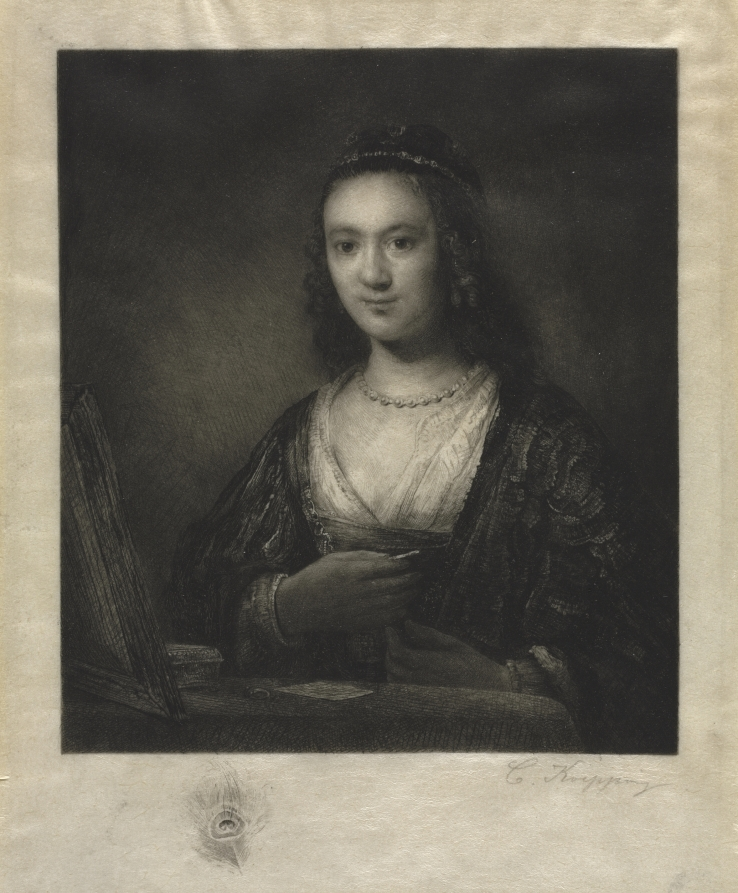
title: Portrait of a Woman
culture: Germany, 19th century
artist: Carl Köpping (German, 1848–1914)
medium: etching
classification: Print